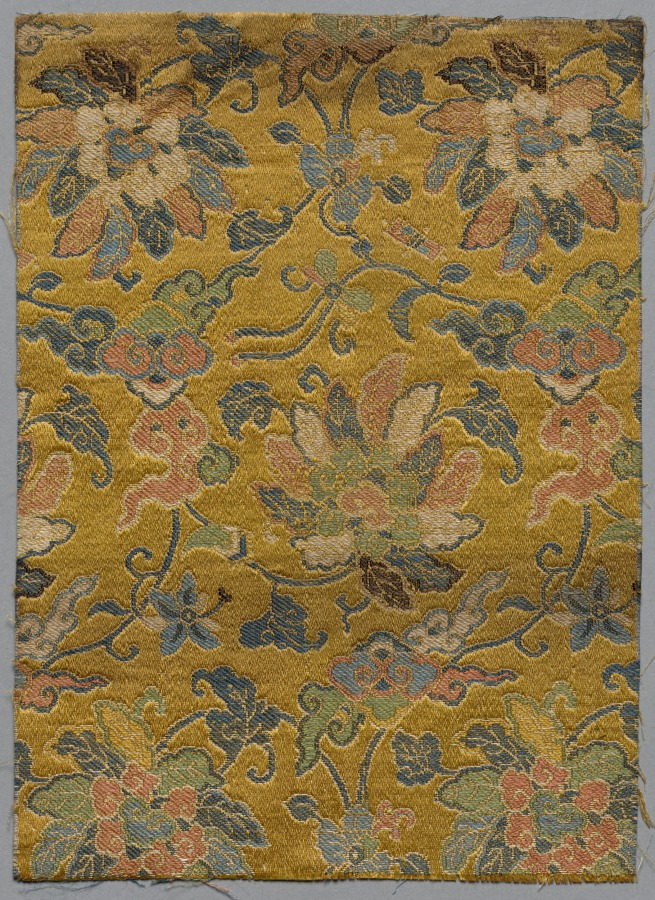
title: Fragment from Book of Textiles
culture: China, Qing dynasty (1644-1911)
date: 1700s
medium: Silk, diaper weave; satin ground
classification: Textile